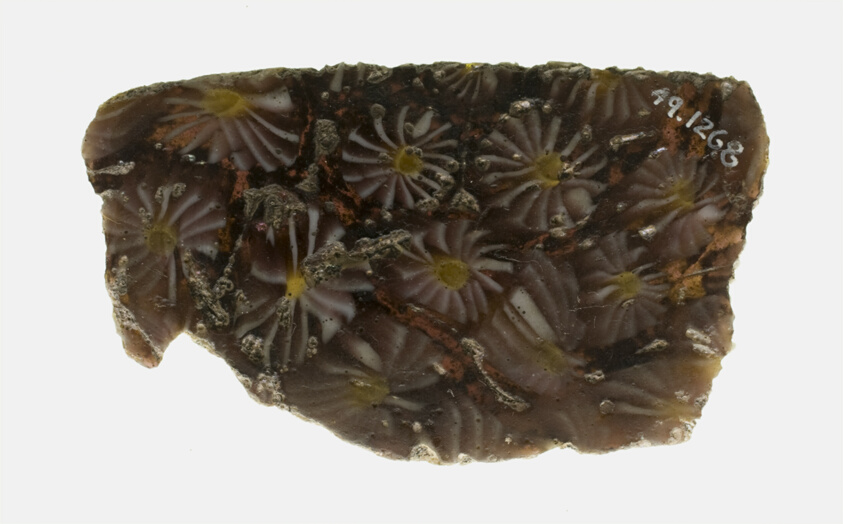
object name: Decorative Arts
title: Fragment of a Plate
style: roman (ancient, style or period), ancient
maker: Roman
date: 1st century BCE–1st century CE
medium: Glass, mosaic glass technique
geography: Roman Empire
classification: fragment; decorative arts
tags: decoration